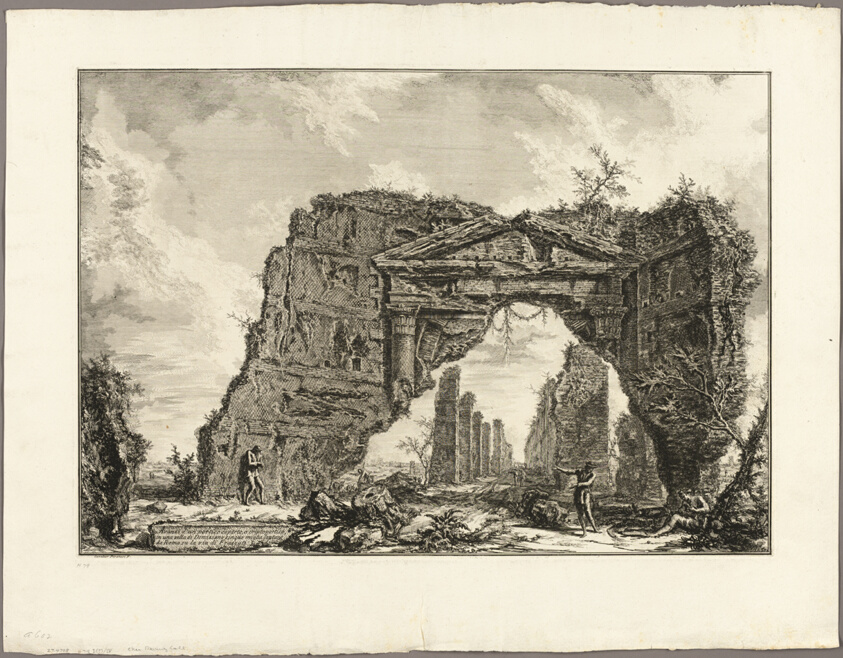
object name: Print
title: Remains of a covered portico, or a cryptoporticus, in a villa of Domitian, five miles outside Rome on the Frascati road, from Views of Rome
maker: Giovanni Battista Piranesi (Italian, 1720-1778)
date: 1766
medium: Etching on heavy ivory laid paper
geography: Italy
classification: etching; print; prints and drawing